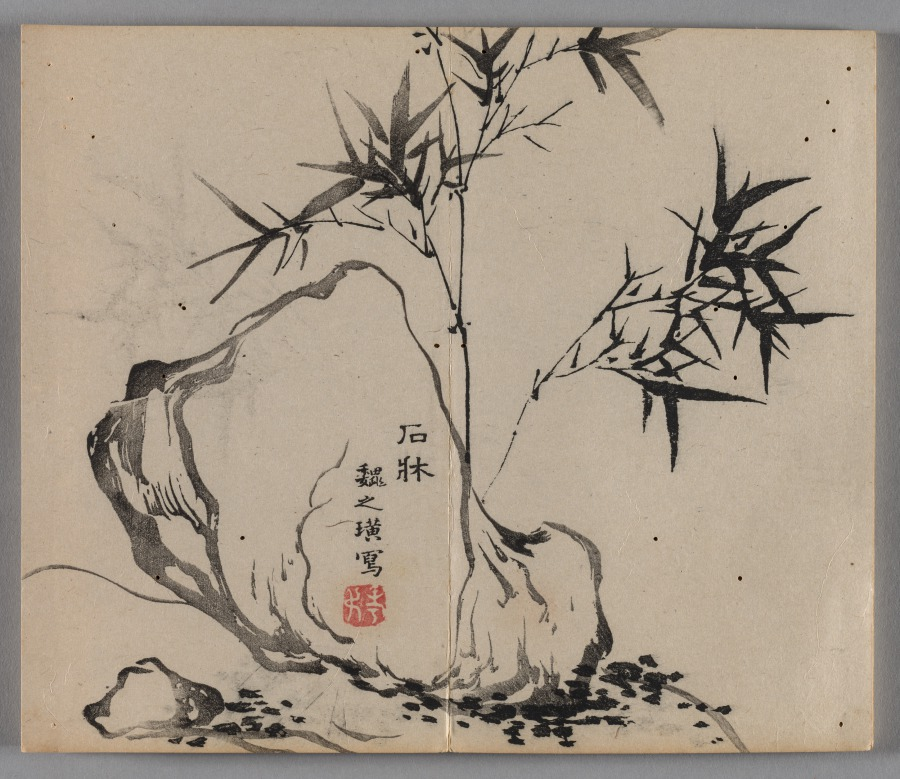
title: Ten Bamboo Studio Painting and Calligraphy Handbook (Shizhuzhai shuhua pu): Bamboo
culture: China, Qing dynasty (1644-1911)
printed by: Hu Zhengyan (Chinese, c. 1584–1674)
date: 1633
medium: Woodblock-printed book; ink and colors on paper; first edition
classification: Print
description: Color printing reached a level of perfection in the early 1600s, as seen in this Ten Bamboo Studio Collection of Calligraphy and Painting and the Mustard Seed Garden Manual of Painting (printed 1679 and 1701). The painterly quality, precision in registering (aligning) the woodblocks, and harmonious colors made them the most successful color print editions in Chinese history. Both editions were printed and compiled in Nanjing, spread nationwide, and had a great impact on the arts in Japan and Korea.